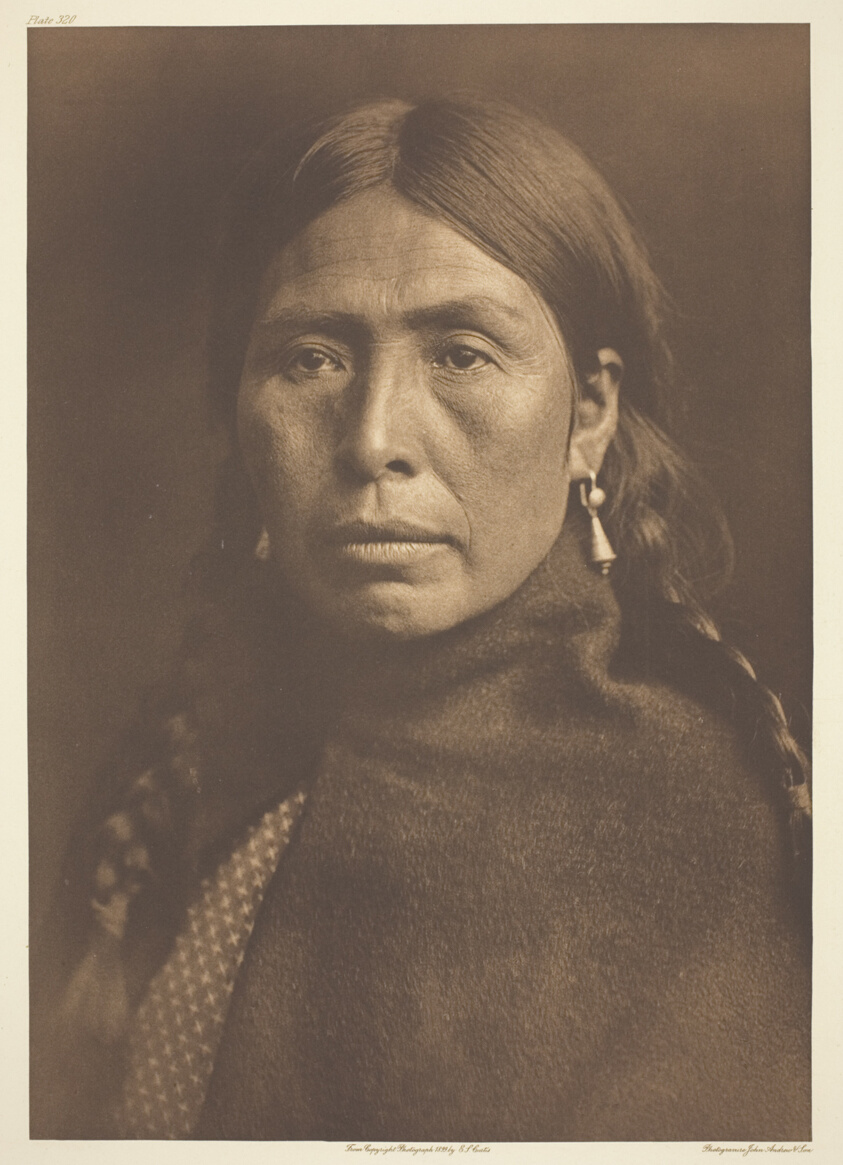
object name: Photograph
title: Lummi Type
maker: Edward S. Curtis (American, 1868–1952)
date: 1899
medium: Photogravure, plate 320 from "The North American Indian, Volume 9" (1913)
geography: United States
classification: photogravure; photomechanical process; photography; photograph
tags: portraits, portraits: female subject, photography, portraits: Native American subject